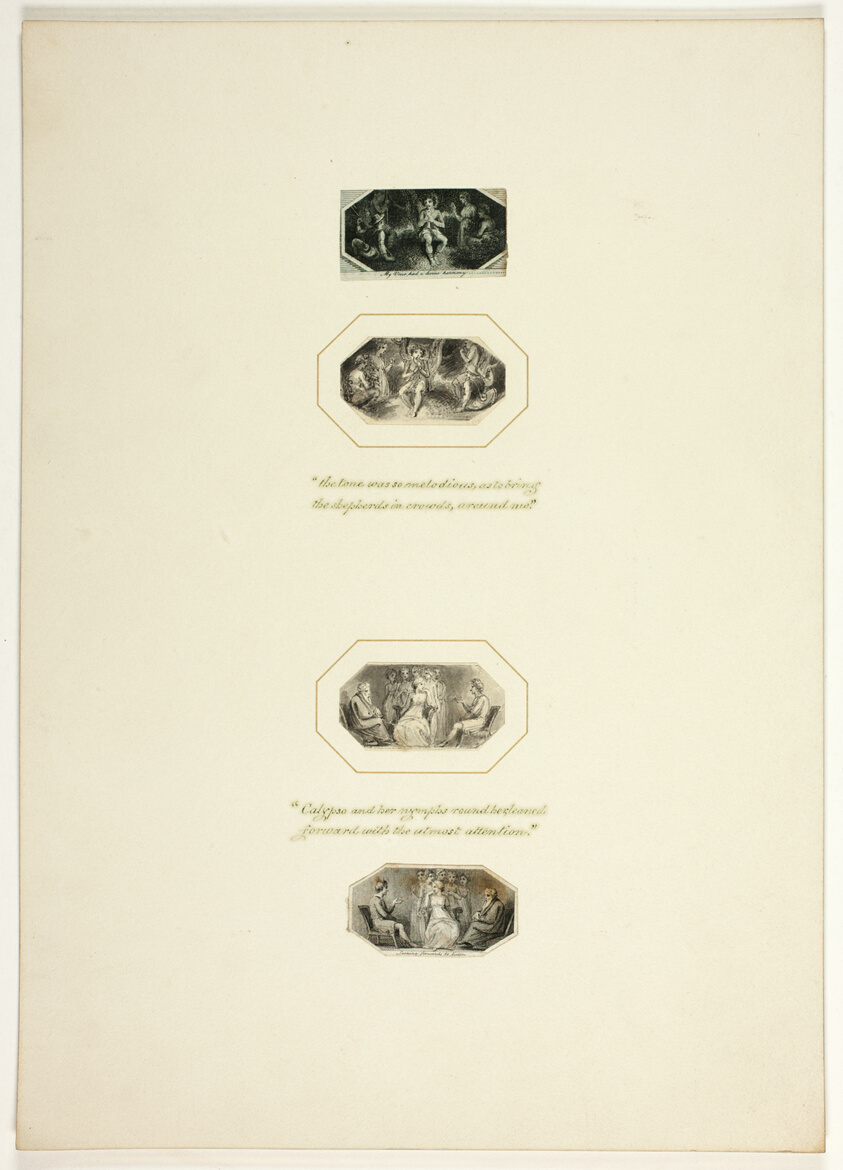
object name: Drawing and Watercolor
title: Study for a plate from Telemachus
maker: Thomas Stothard (English, 1755-1834)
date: c. 1797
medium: Ink wash on paper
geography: England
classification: ink and wash; prints and drawing; paper; drawings (visual works)